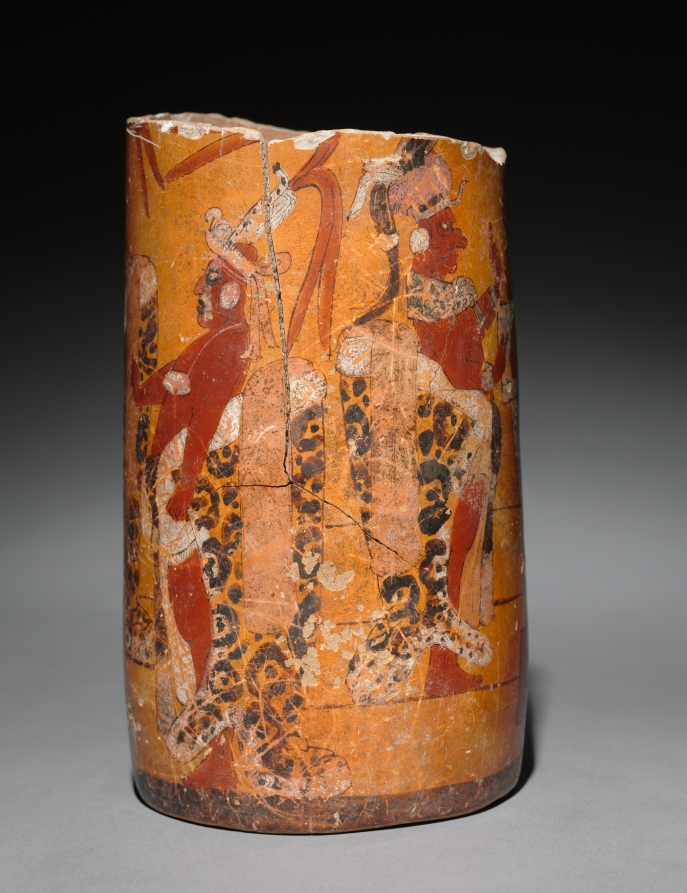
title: Cylindrical Vessel with Palace Scene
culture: Mexico or Central America, Maya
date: 600–900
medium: earthenware with colored slips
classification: Ceramic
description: The scene here may commemorate a special event in the life of a Maya ruler, who stands on a stairway before his throne, his legs framed by a litter on the ground. His gesture and the jaguar pelt at the waist visually unify him with his attendants. The ruler perhaps used the vessel as a drinking cup on important occasions; fine ceramics also served as gifts and as offerings in tombs.